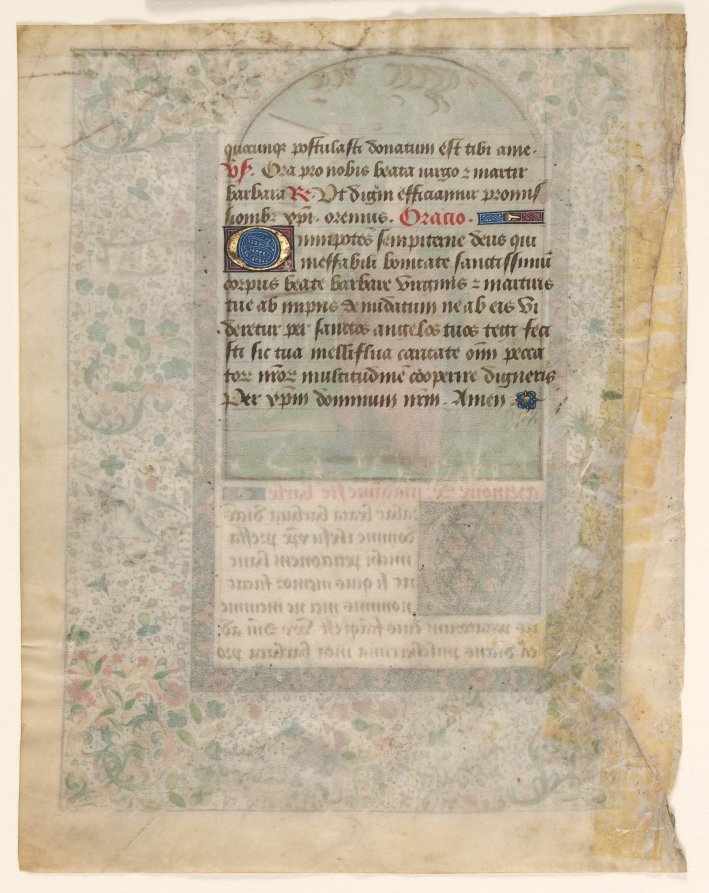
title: Leaf from a Book of Hours: St. Barbara (2 of 2 Excised Leaves)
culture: France, Eastern France or Paris (?), 15th century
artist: Master of Jacques de Luxembourg (French)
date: c. 1465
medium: ink, tempera and gold on vellum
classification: Manuscript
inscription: Memore de madame ste barbe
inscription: Oratio: Omnipotens sempiterne Deus qui… corpus beatae Barbare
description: Saint Barbara was popular in France, known for being imprisoned in a tower by her father and living as a hermit. In piety, she asked builders to construct her three windows to symbolize the Holy Trinity of the Father, Son, and Holy Spirit. Her father, enraged by her conversion to Christianity, killed her, after which he was struck by lightning from heaven. She was seen as a protector from sudden death, a common medieval concern, and the patron saint of architects and builders. The text on this leaf is in French, as opposed to Latin.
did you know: The owner of a book of hours was intended to stop eight times a day and read the appropriate devotional text.